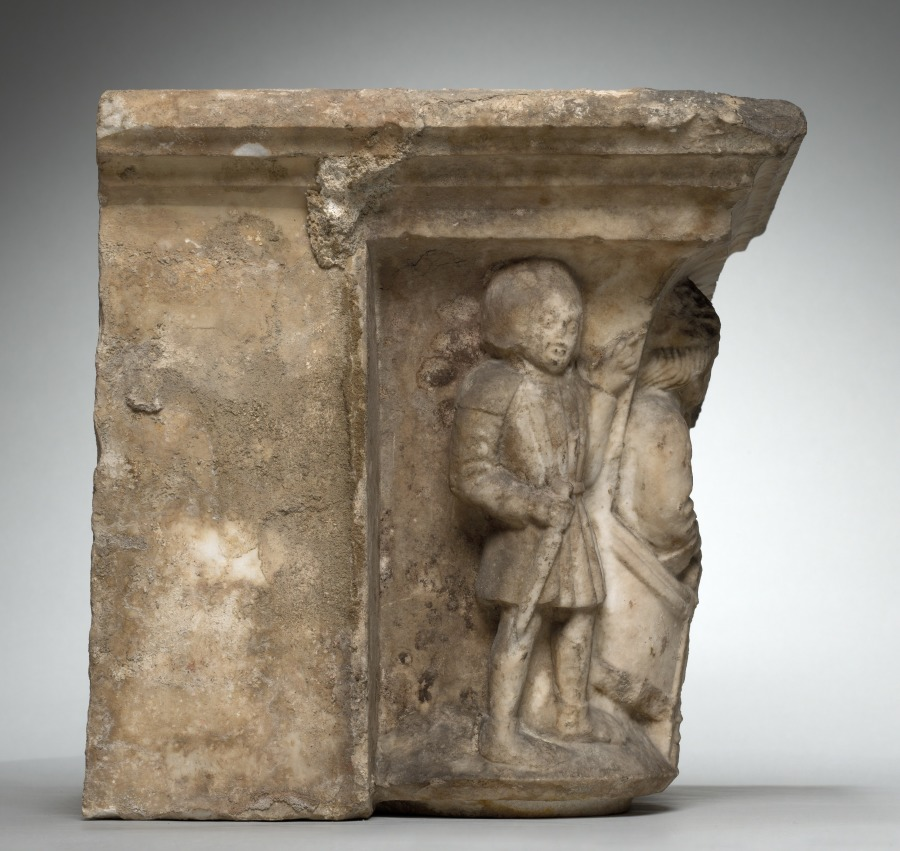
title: Engaged Capital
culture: Southern France, Abbey of Larreule, near Tarbes, 15th century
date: 1400s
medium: limestone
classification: Sculpture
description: This capital belongs to a surviving group including other architectural fragments that once decorated the cloister of the Abbey of Larreule. A cloister was a covered walkway or arcade, usually around all four sides of a square area of grass (the "cloister garth"). The seclusion of the cloister was the monks’ exclusive domain, off limits to others. Here, the monks were supposed to pray, study, meditate, and exercise in privacy and solitude. Such cloister capitals served both to instruct the monks and as a focus for their devotions. Other capitals in this series are installed in the Jardin Massey at Tarbes, near the original abbey. An arch from Larreule has been assembled with other associated French capitals at The Cloisters in New York.